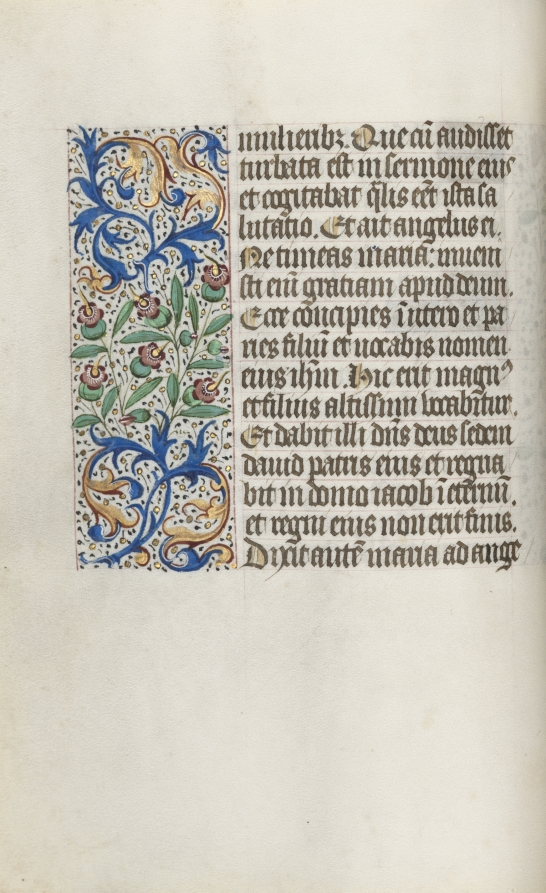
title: Book of Hours (Use of Rouen): fol. 15v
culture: France, Rouen, 15th century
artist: Master of the Geneva Latini (French, active Rouen, 1460–80)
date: c. 1470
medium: ink, tempera, and gold on vellum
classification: Bound Volume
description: In the late 1400s and early 1500s Rouen was an established and important center of book production. The city’s cathedral had a wealthy chapter that spent large sums of money to commission books and to maintain its extensive library. The stationers and booksellers would have likely been concentrated in or near the cathedral precinct. This artist, named after a manuscript now in Geneva, was Rouen’s principal illuminator during the second half of the 1400s.